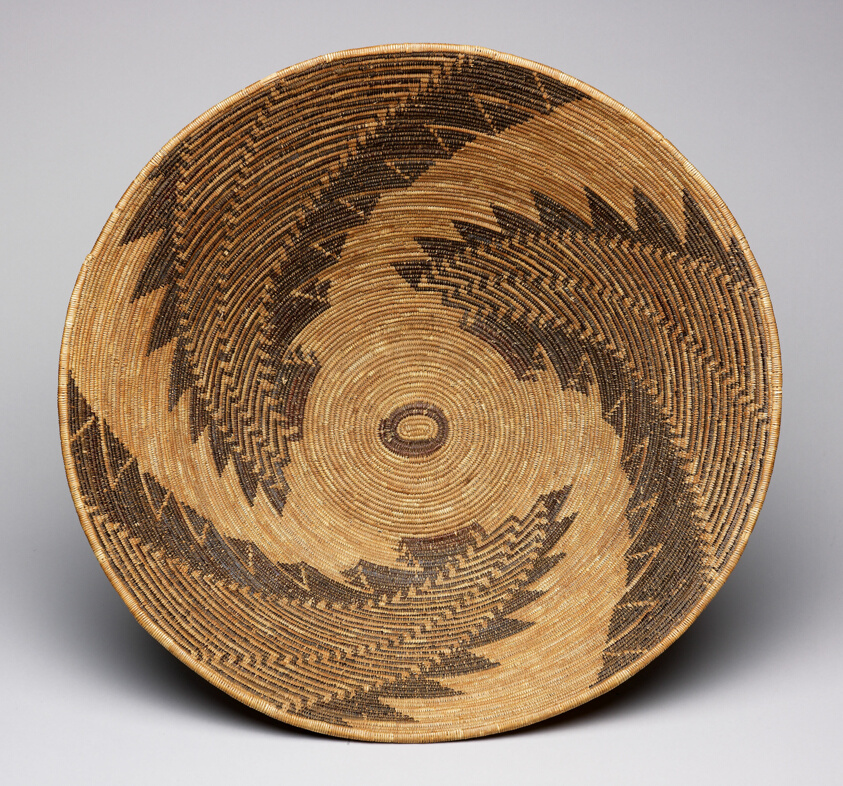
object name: Basketry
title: Food Basket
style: maidu, native american, northern california, americas, native north american, Arts of the Americas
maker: The mother of Salena Jackson; Maidu, active late 19th/early 20th century; Near Susanville, northern California, United States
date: 1870–90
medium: Plant fibers and pigment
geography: Northern California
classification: basketry; art of the americas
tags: basketry, baskets, storage, zigzags, geometric, feast